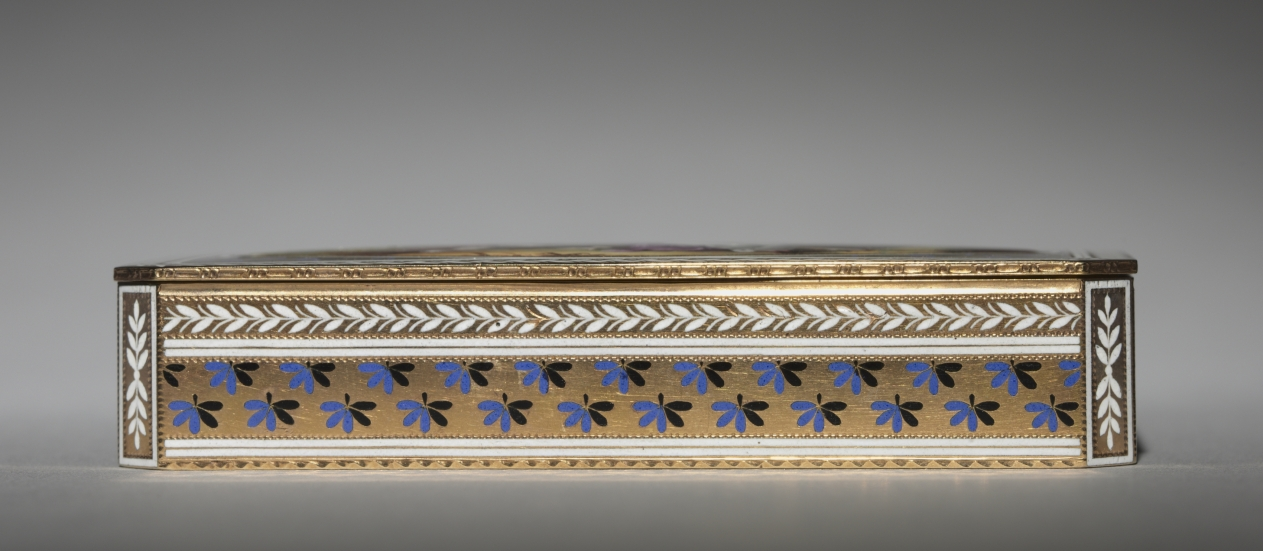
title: Box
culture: Switzerland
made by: probably by F. Joanin (Swiss)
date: c. 1810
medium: gold and enamel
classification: Miscellaneous